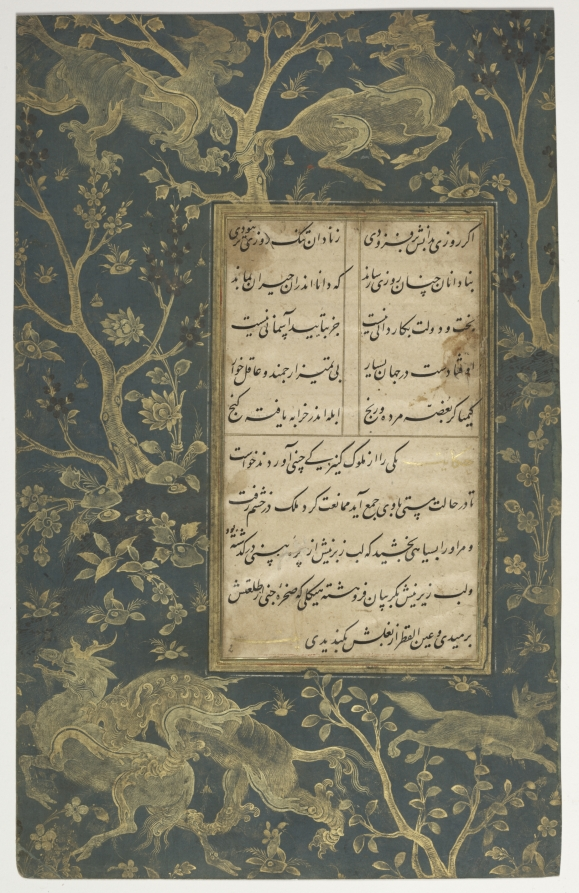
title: Illuminated folio (recto) from a Gulistan (Rose Garden) of Sa'di (c. 1213–1291)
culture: Iran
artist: Sultan 'Ali al-Mashadi (Iranian, 1430–1520)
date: calligraphy: c. 1475–1500; border: c. 1550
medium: Gum tempera, ink, gold, and silver on paper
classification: Manuscript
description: Silver and gold paints were used against an indigo blue background to create a fantastic frame for the text of the Gulistan. Meaning “rose bush” in Persian, this text is a collection of anecdotes in both verse and prose. Here, a winged lion chases a winged deer from the upper margins to the lower, where it rends the mythical deer and sends a toothy fox running.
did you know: Words in gold ink mark new sections, while the main text is written in black.